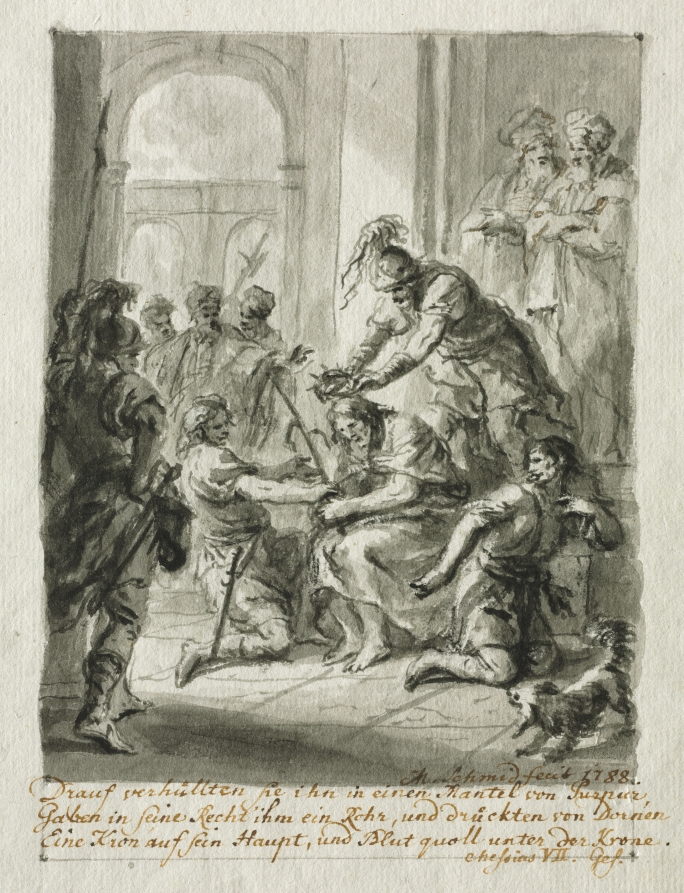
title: Christ Crowned with Thorns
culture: Germany, 18th century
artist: Martin Johann Schmidt (Austrian, 1718–1801)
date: 1788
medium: brush and gray ink and gray wash with black chalk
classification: Drawing